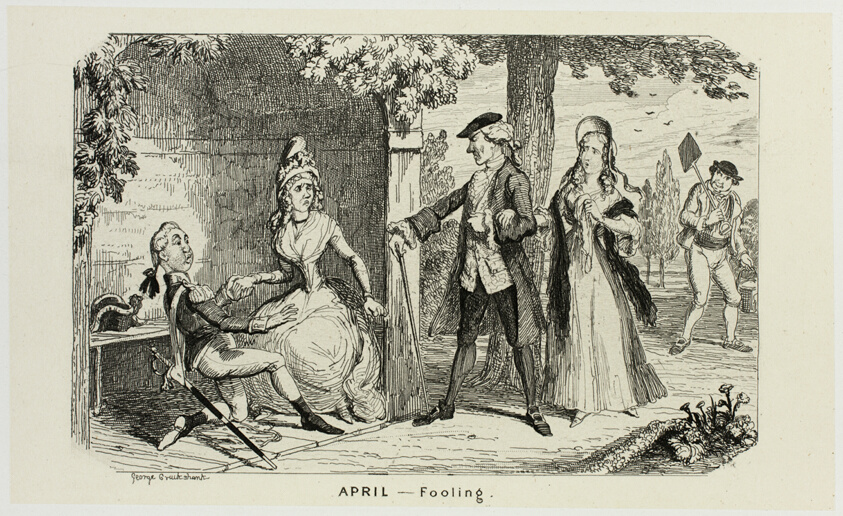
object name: Print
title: April - Fooling from George Cruikshank's Steel Etchings to The Comic Almanacks: 1835-1853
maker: George Cruikshank (English, 1792-1878); published by Pickering & Chatto (English, 19th century)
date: 1839, printed c. 1880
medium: Steel etching in black on cream India paper, laid down on off-white card (chine collé)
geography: England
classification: etching; paper; steel; print; prints and drawing